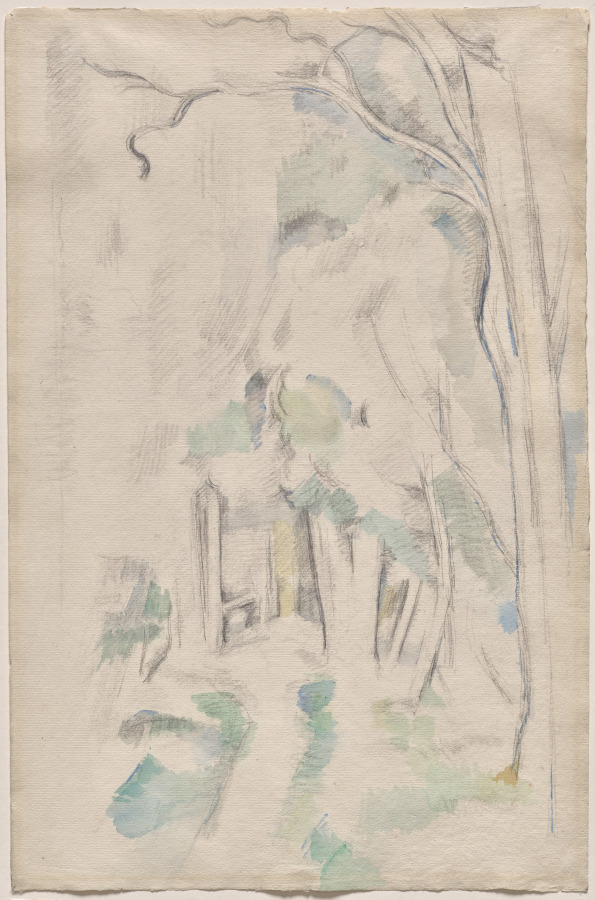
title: Footpath in the Woods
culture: France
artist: Paul Cezanne (French, 1839–1906)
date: 1882–84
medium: watercolor and graphite on modern laid paper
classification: Drawing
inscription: signed, in pencil, on verso: Vollard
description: Paul Cezanne is known for moving beyond the visible brushwork of Impressionism toward a “constructive stroke,” in which each mark built a cohesive whole. He favored subjects that he saw as timeless, including landscape, the focus of this watercolor. Cezanne depicted chestnut trees at the Jas de Bouffan, his family estate outside Aix-en-Provence in southern France. He used graphite lines and areas of muted watercolor, but also the whiteness of his sheet of paper to represent the scene. The artist worked in watercolor throughout his entire career, seeing it as a site of experimentation and for developing new ideas.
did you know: This drawing was once owned by collectors Leo and Gertrude Stein, in whose Parisian apartment it would have been seen by a young Pablo Picasso.